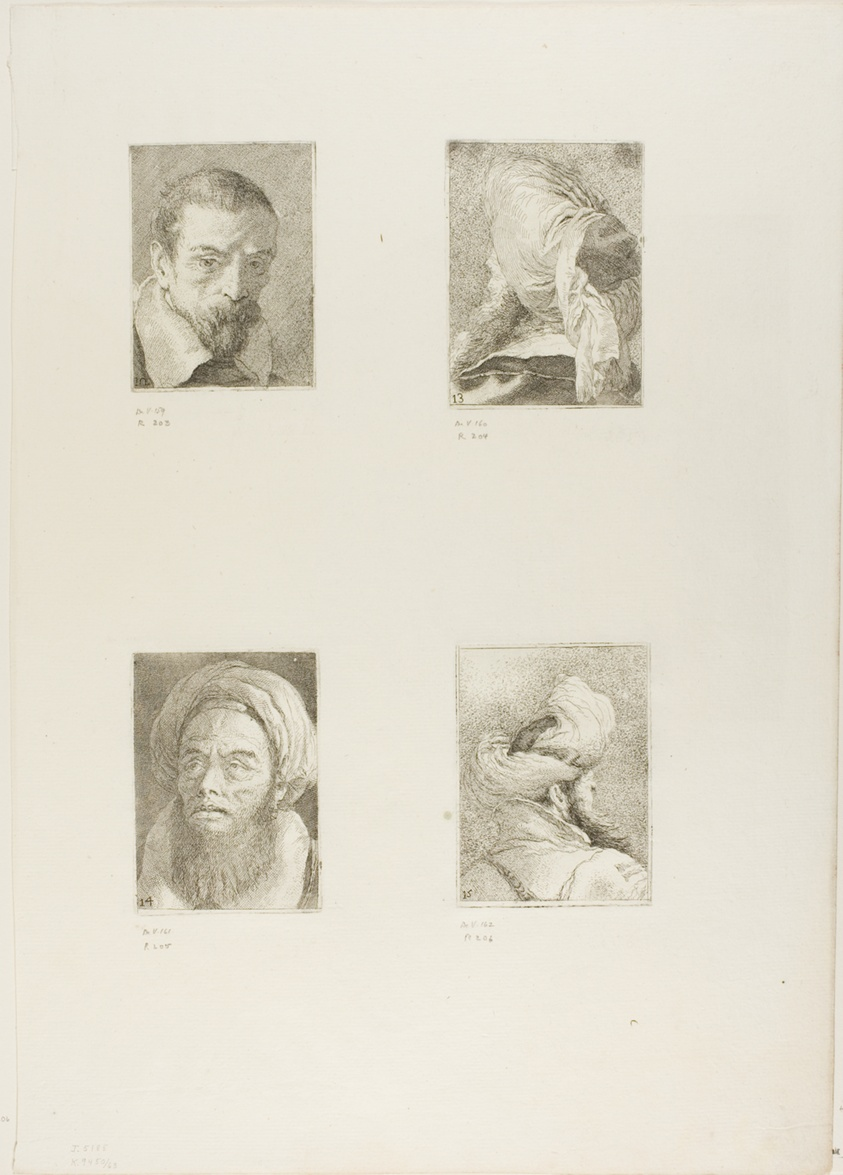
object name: Print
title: Old Man with a Beard and a Bare Head, Turk Seen from Behind, Turk with a Turban, Turk Seen from Behind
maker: Giovanni Domenico Tiepolo (Italian, 1727-1804)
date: 1775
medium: Four etchings on ivory laid paper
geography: Italy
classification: etching; print; prints and drawing